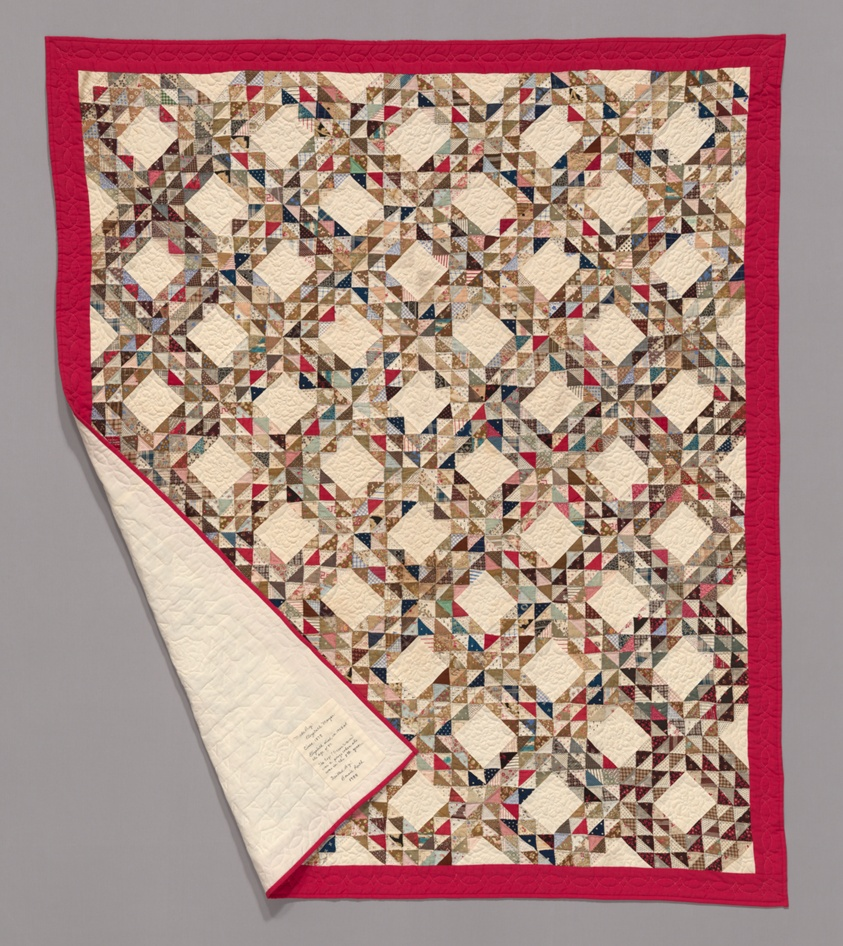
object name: Textile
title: "Ocean Wave" Quilt Bedcover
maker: Made by Frances Brooks Wyld; American, died 1958; United States, Illinois, Chicago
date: c. 1883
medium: Cotton, plain weaves; printed; cotton, twill weaves; pieced; edged and backed with cotton, plain weave; quilted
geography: United States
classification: needlework - quilt; textile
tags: Chicago